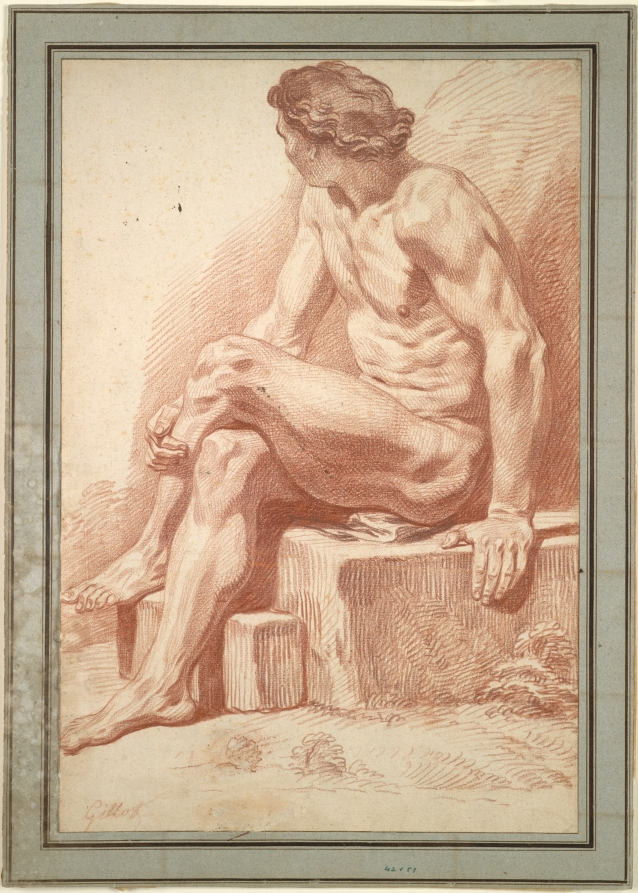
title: Seated Male Nude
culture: France, 18th century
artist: Claude Gillot (French, 1673–1722)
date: 1693–95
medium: red chalk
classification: Drawing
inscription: Signed, lower left in sanguine: Gillot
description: Michelangelo’s masterful rendering of the male nude set the standard for many generations of artists studying in academies across Europe. Life drawings (made from nude models) became so essential to an artist’s training at the Royal Academy of Painting and Sculpture in Paris (founded in 1648 by Louis XIV) that finished drawings like these were commonly called academies. Louis de Boullogne served as a professor of life drawing at the Royal Academy between 1694 and 1715. This work reflects the common practice of drawing from models. Here, the pose of the red chalk academie by Claude Gillot is reminiscent of the twisting male bodies on Michelangelo’s Sistine Chapel ceiling. Gillot may have seen prints or drawings of Michelangelo’s figures, though his model is more visually connected to the studio: for example, he drew the model’s stone perch as well as the drape tucked beneath his body.